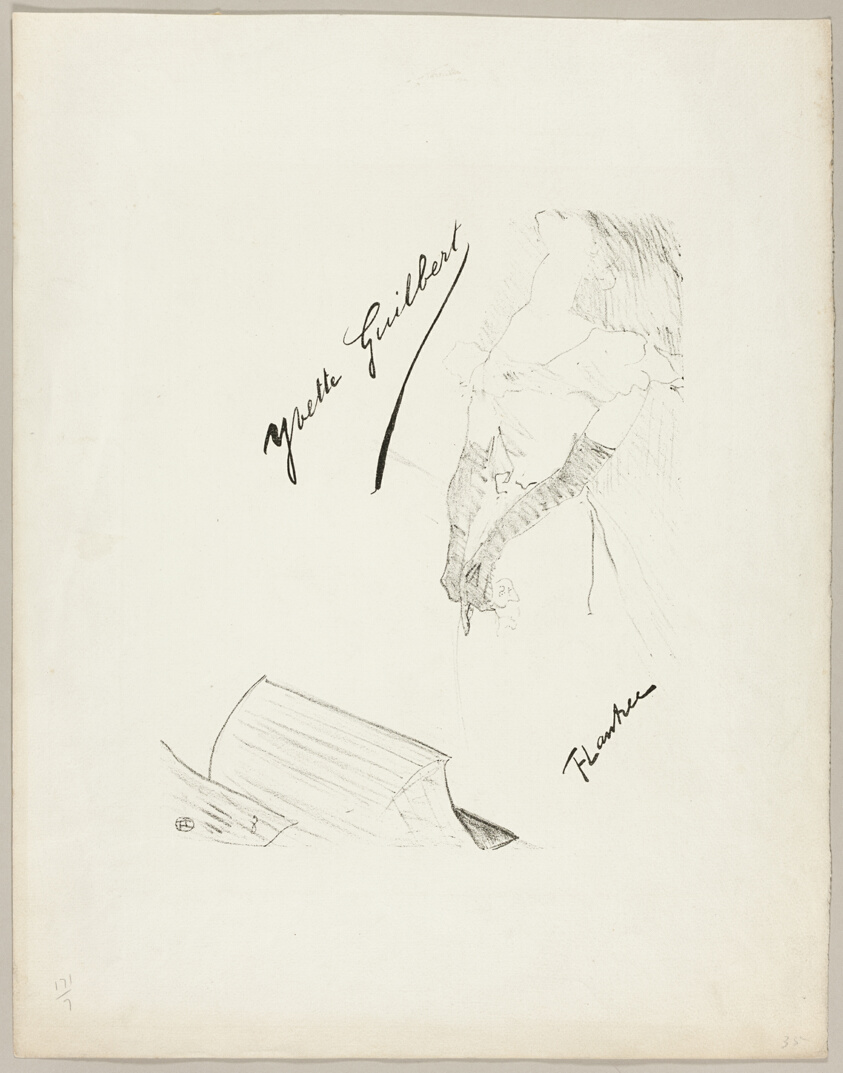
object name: Print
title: Yvette Guilbert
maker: Henri de Toulouse-Lautrec (French, 1864-1901)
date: 1898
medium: Lithograph on paper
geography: France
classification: print; prints and drawing